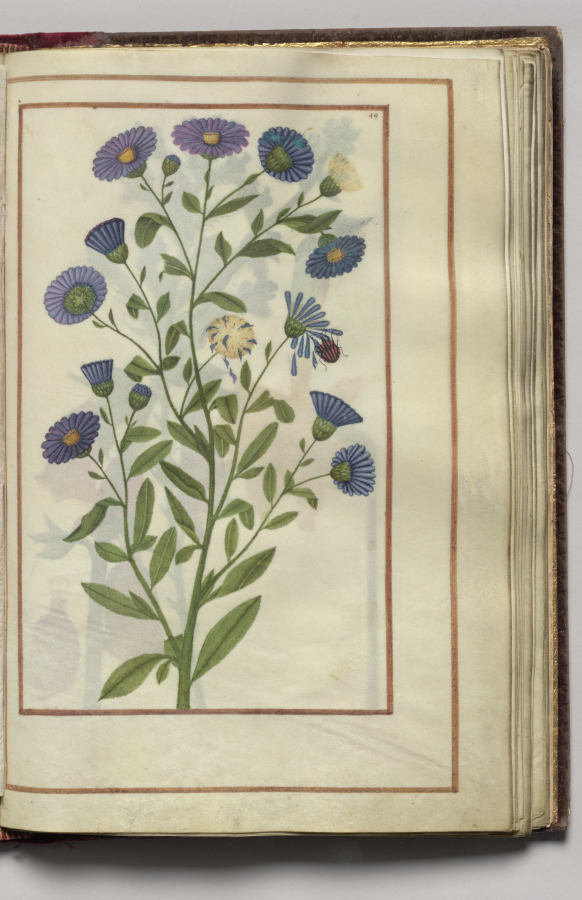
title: Blue Aster, folio 25 (recto), from Florilegium (A Book of Flower Studies)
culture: France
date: 1608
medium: watercolor, ink, silver and gold over occasional traces of pencil, on vellum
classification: Bound Volume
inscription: Dated: Poitiers 1608 (on frontispiece) Signed: On frontispiece in black ink, lower right: Van Kuyk Notation on drawing: Frontispiece: in pencil, lower margin: * élève de Van Kessel, peintre flammand (* in pencil also appears in front of Van Kuyk's name).